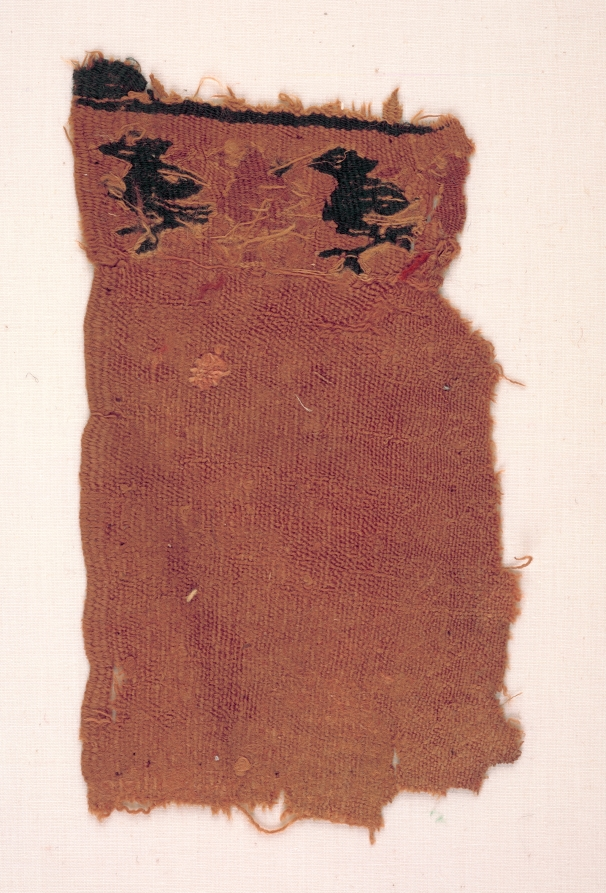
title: Fragment with Frieze of Birds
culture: Egypt, Byzantine period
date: 400s - 500s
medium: tabby ground, inwoven tapestry ornament; wool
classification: Textile